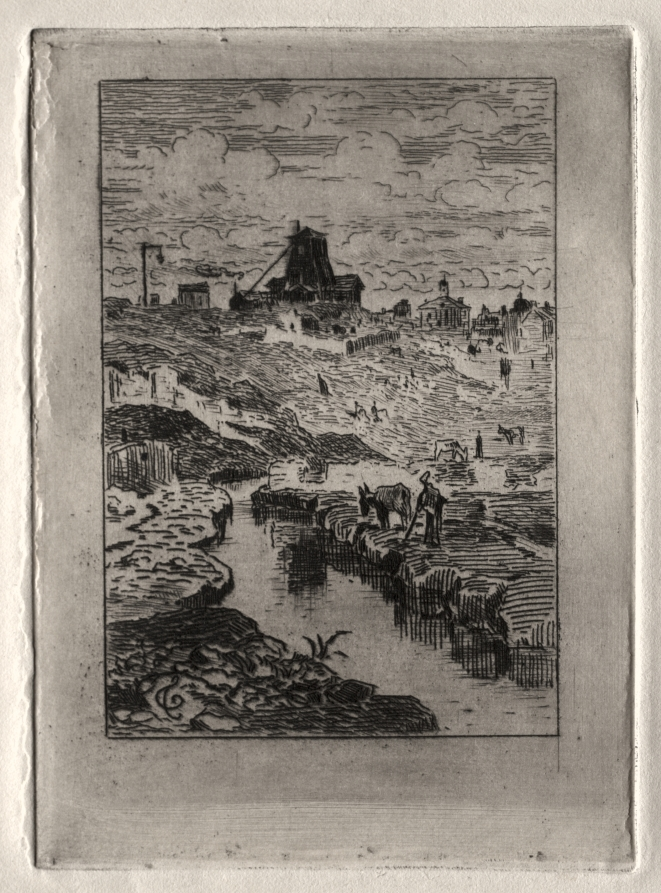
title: The Well at the Hill of Cailles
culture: France, 19th century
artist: Félix Hilaire Buhot (French, 1847–1898)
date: c. 1870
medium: etching and drypoint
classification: Print